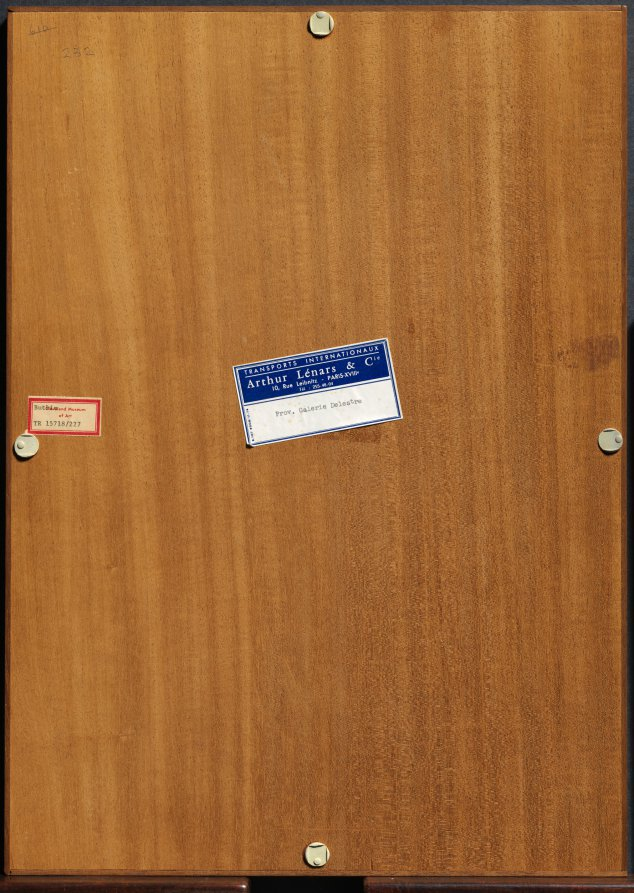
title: Ruined Church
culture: France, 19th century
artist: Adrien Dauzats (French, 1804–1868)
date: c. 1840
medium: oil on panel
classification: Painting